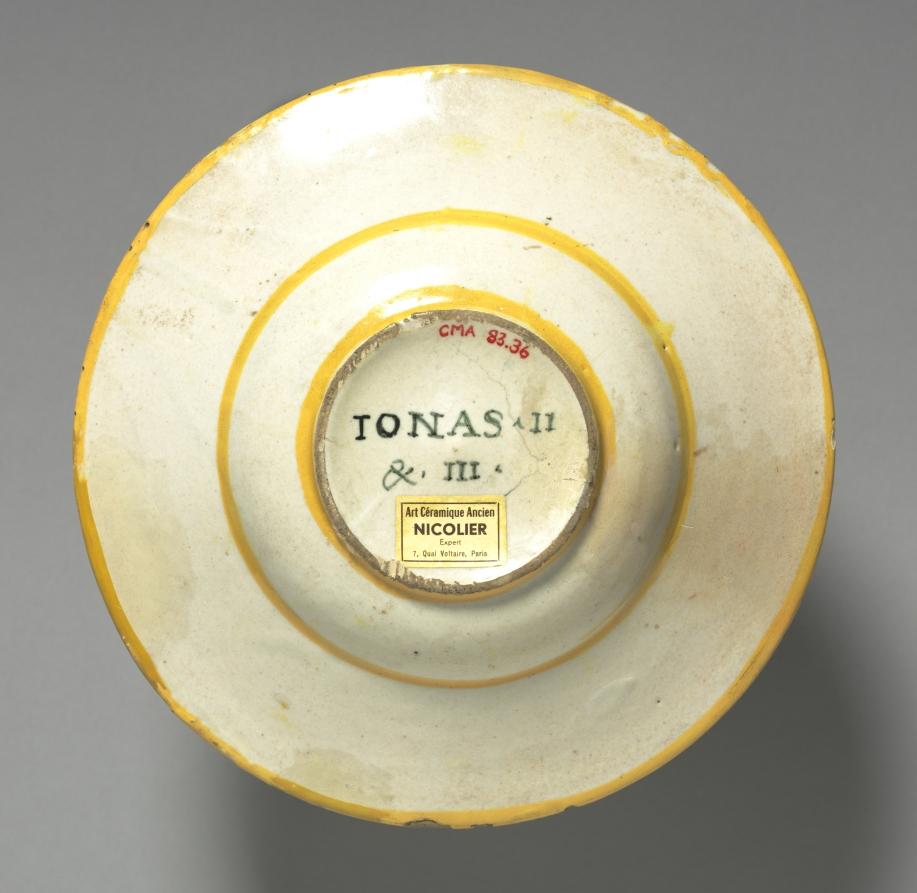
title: Plate Depicting Jonah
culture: France, Lyon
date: late 1500s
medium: tin-glazed earthenware (maiolica)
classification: Ceramic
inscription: inscribed on reverse: IONAS II/&III.